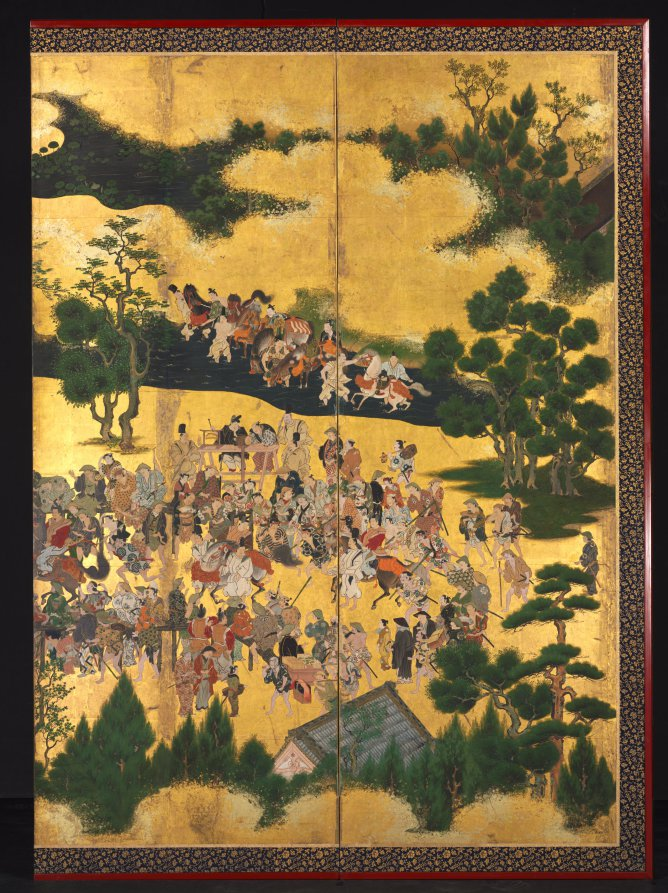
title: Horse Race at the Kamo Shrine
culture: Japan, Edo period (1615–1868)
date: early to mid-1600s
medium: One of a pair of six-panel folding screens; ink and color on gilded paper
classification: Painting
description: Kamo Shrine in Kyoto, seen in the upper half of the left screen, has held an annual horse race on May 5th since the ninth century. Serving as a snapshot of the festivities, this pair of screens captures nearly 600 people watching the race, beginning at the bottom part of the right screen and continuing to the left. The race is a great spectacle where aristocratic riders cling to their fast and unwieldy mounts. While many of those in attendance seem in rapt attention to the main event, other vignettes depict people engaged in an array of activities. This pair of screens was likely originally part of a group of linked murals.